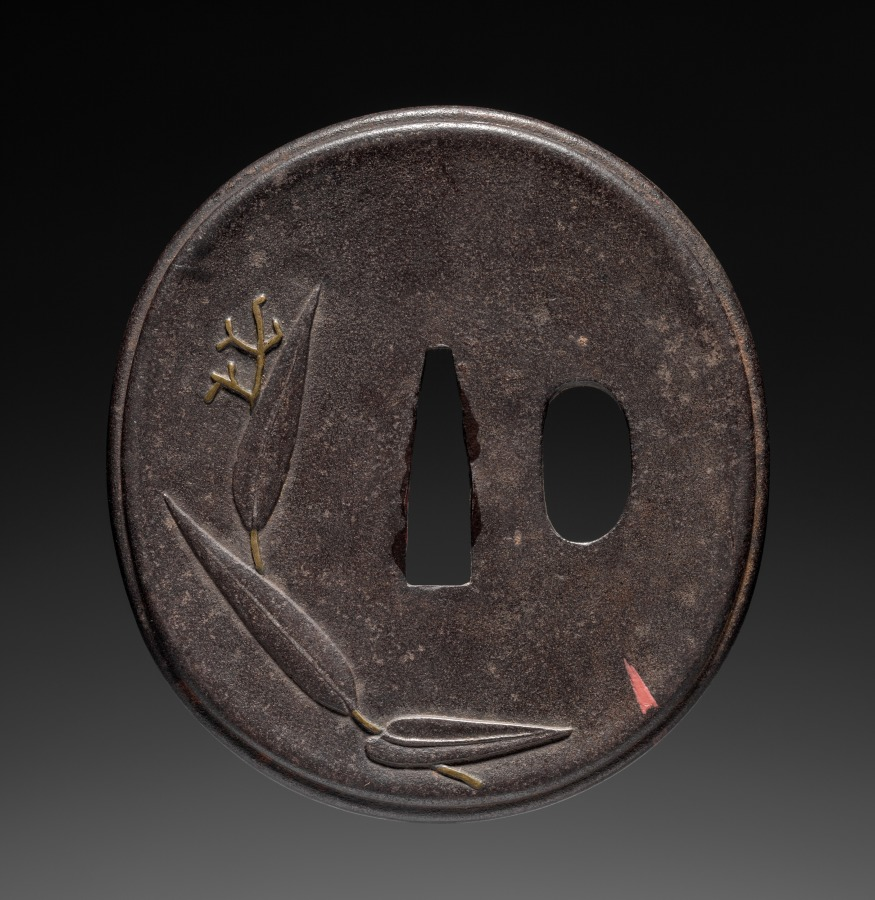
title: Sword Guard (Tsuba) Goose in Reeds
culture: Japan, possibly Edo period (1615-1868)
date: c. 1615–1868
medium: iron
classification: Arms and Armor